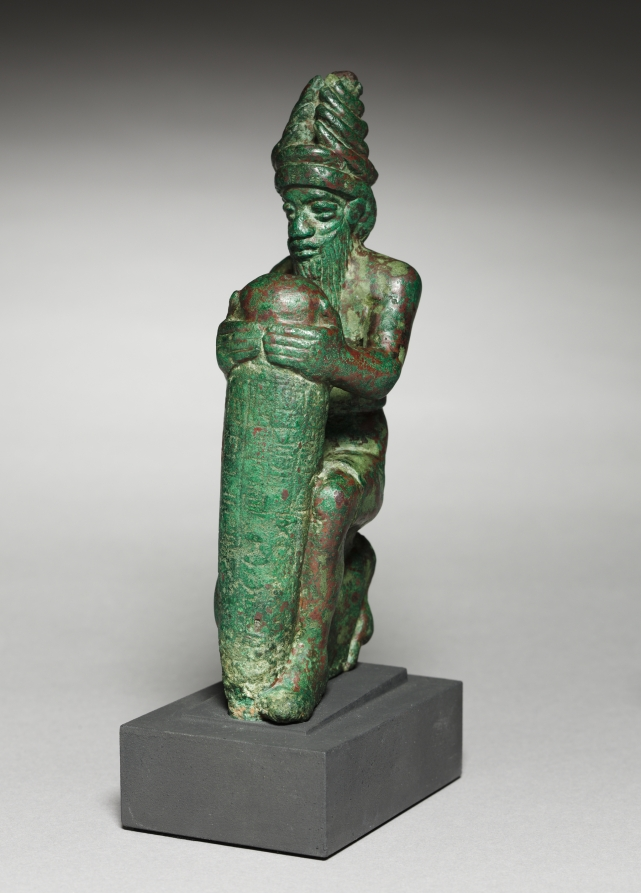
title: "Foundation Nail" of Gudea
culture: Mesopotamia, Neo-Sumerian, Iraq, probably Lagash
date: c. 2100 BCE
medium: copper alloy, lost-wax cast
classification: Sculpture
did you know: The ruler Gudea placed one of these special nails in every temple he built in order to commemorate it.